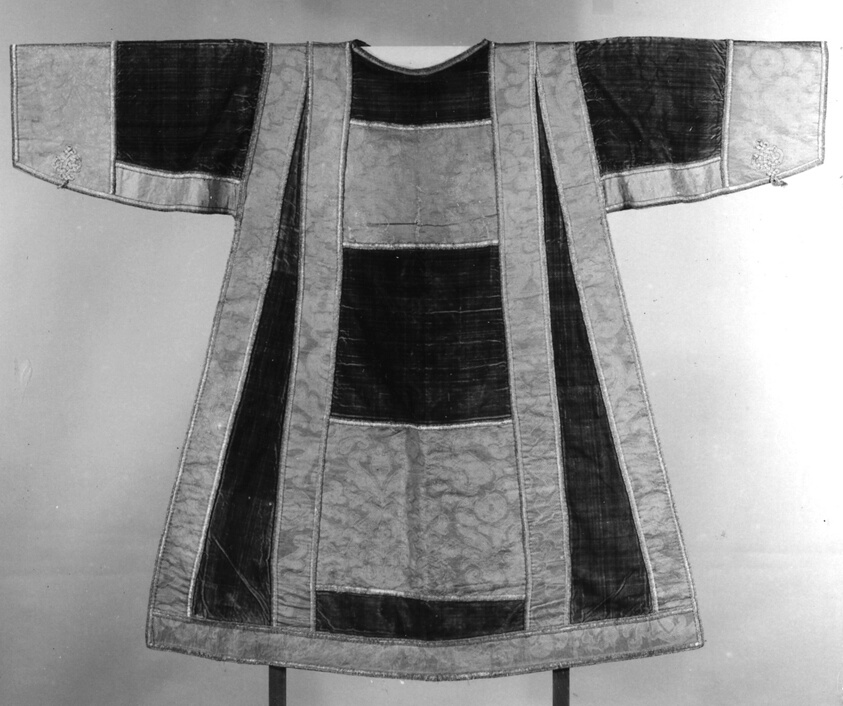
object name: Costume and Accessories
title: Dalmatic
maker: Italy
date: 17th century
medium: Red velvet with design of gold brocaded panels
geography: Italy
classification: textile; weaving - velvet; liturgical; costume; dress (garment); clothing